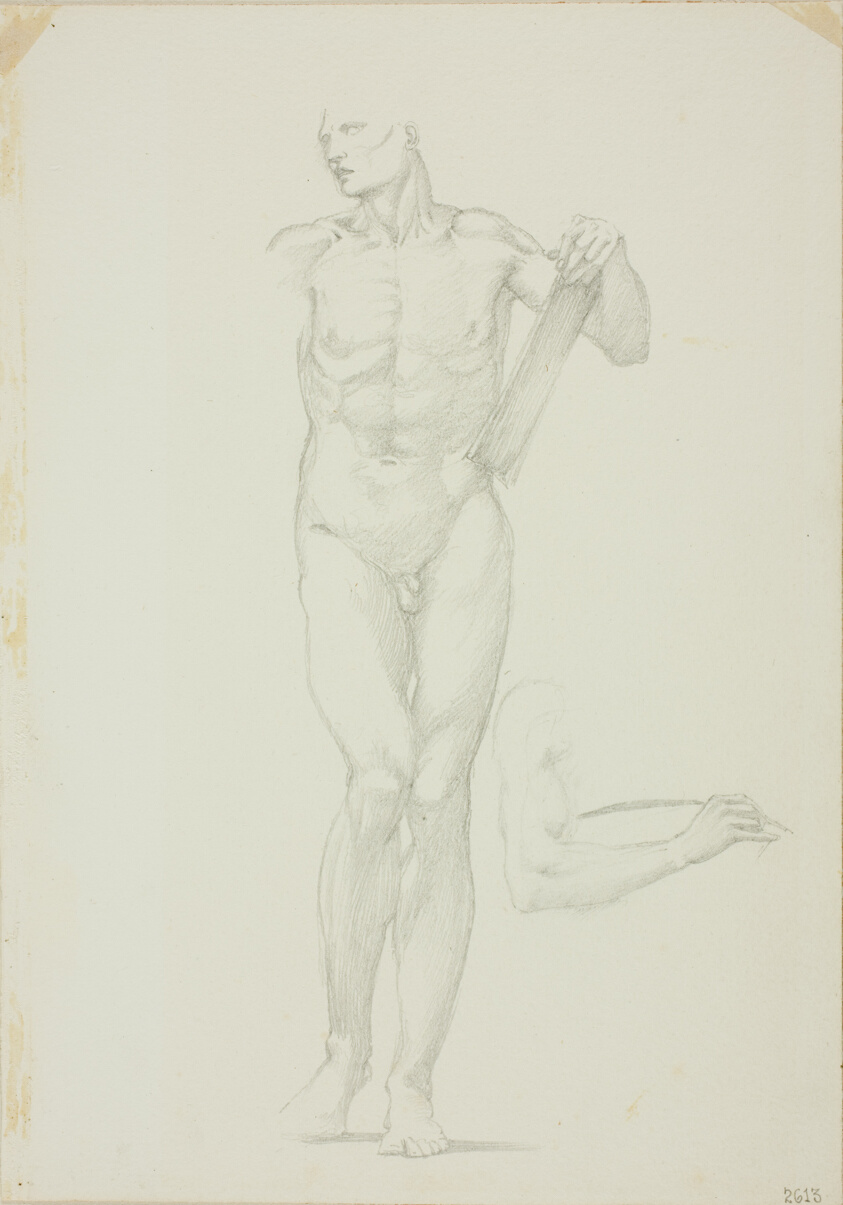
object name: Drawing and Watercolor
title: Standing Male with Tablet; separate sketch of right arm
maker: Sir Edward Burne-Jones (English, 1833-1898)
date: c. 1873–77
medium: Graphite on ivory wove paper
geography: England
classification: graphite; drawings (visual works); prints and drawing